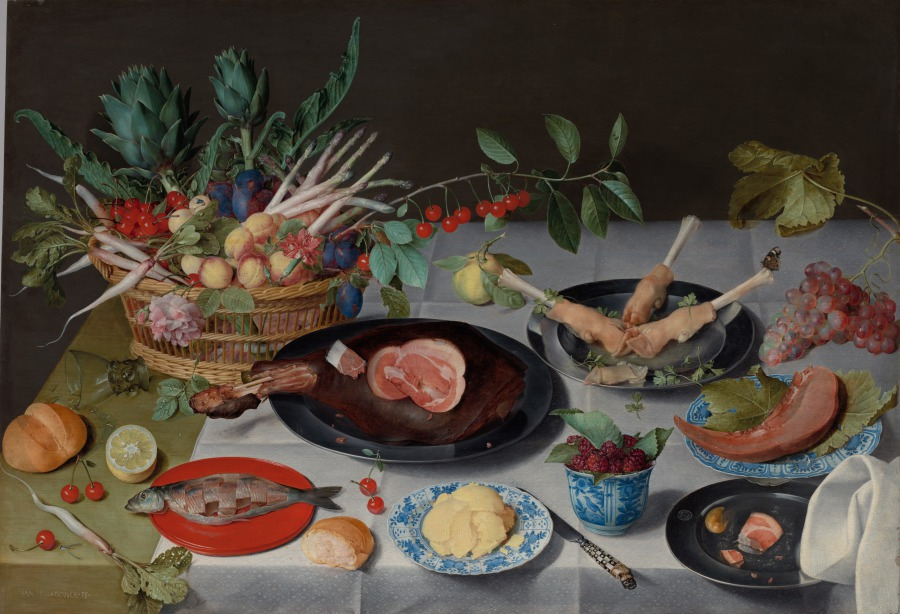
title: Still Life with Meat, Fish, Vegetables, and Fruit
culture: Flanders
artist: Jacob van Hulsdonck (Flemish, 1582–1647)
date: c. 1615–20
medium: Oil on panel, the reverse prepared with gesso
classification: Painting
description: Jacob van Hulsdonck depicted a colorful array of foods, and tablewares ranging from an earthenware trencher to delicate Chinese porcelain—an expensive luxury made possible by international trade. For seventeenth-century viewers, the quantity and variety of foods would have represented a utopian world without scarcity or hunger. Partially eaten food and an overturned glass suggest that diners have just departed, leaving insects to explore the remains.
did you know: Hulsdonck thoughtfully included condiments here: butter, lemon, parsley for the trotters, and a dab of mustard for the ham.